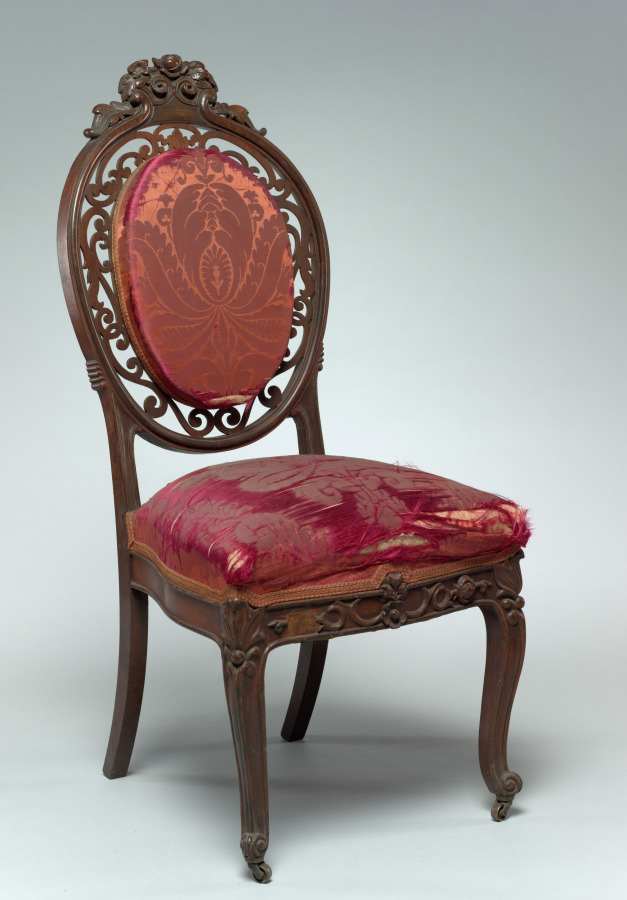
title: Side Chair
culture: America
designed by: Charles H. White (American, 1796–1876)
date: c. 1855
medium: rosewood, red silk damask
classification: Furniture and woodwork